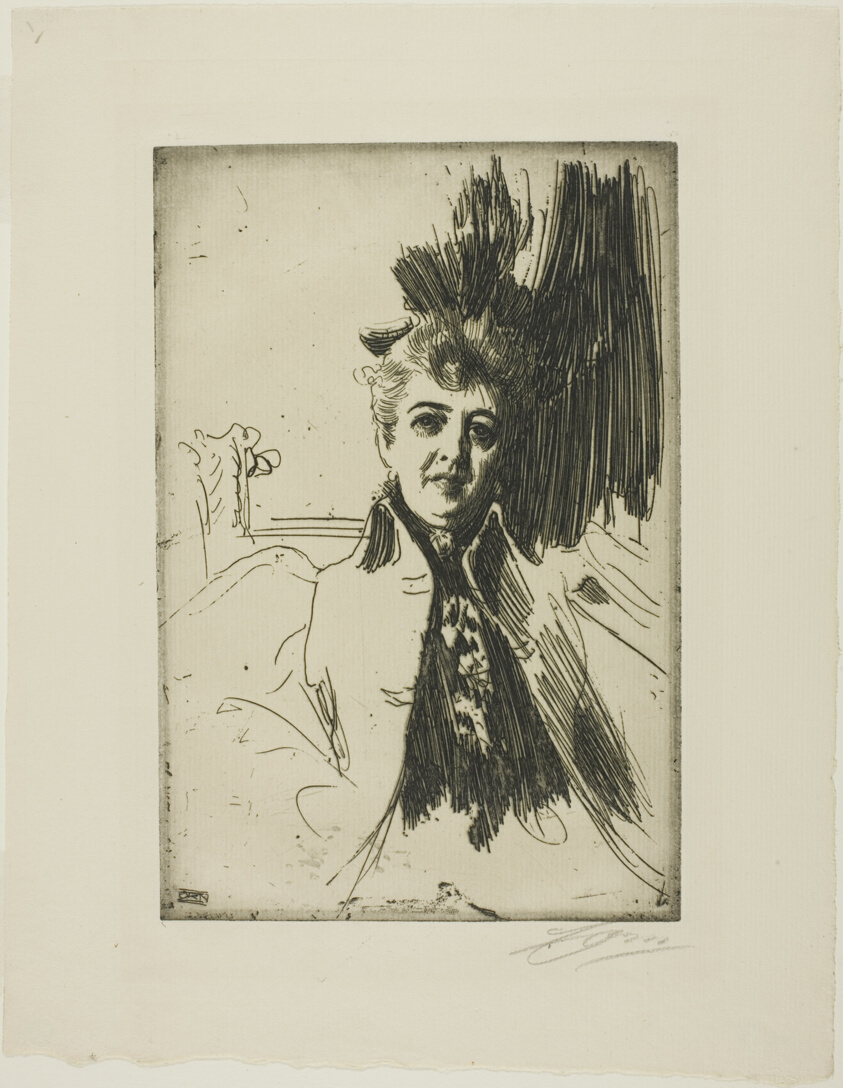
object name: Print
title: Mrs. Potter Palmer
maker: Anders Zorn (Swedish, 1860-1920)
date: 1896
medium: Etching on ivory laid paper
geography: Sweden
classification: etching; print; prints and drawing